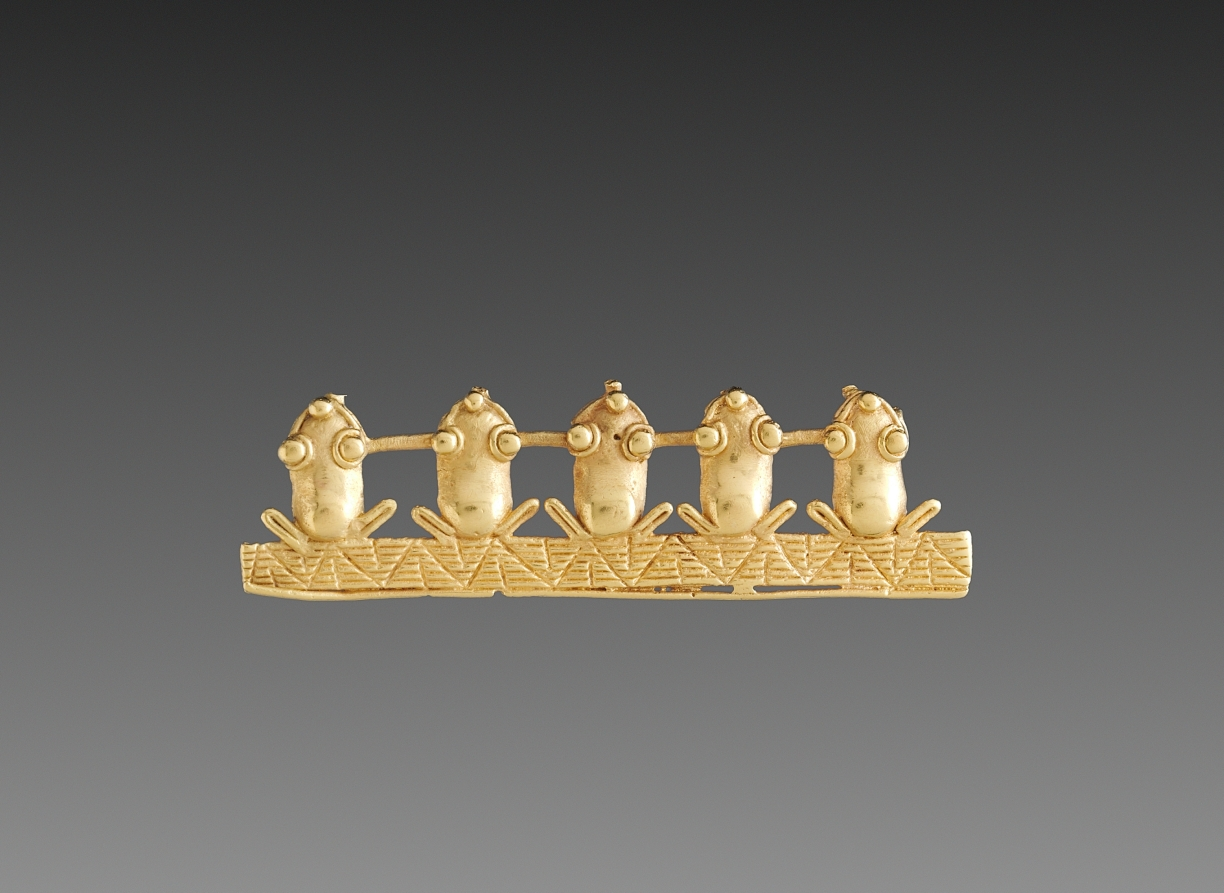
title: Frog Pendant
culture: Panama, Veraguas-Chiriquí style, 11th-16th century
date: c. 1000–1550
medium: cast gold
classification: Metalwork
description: In general, frogs and toads symbolize life-giving water and the green growth it promotes. More surprising is their mythical role as keepers or donors of fire, an association perhaps enhanced by the bright colors that many frogs "flash" when startled, a form of protection. Brightly colored frogs, including those with golden tones, also produce very poisonous toxins, which in part led to a final connection with the underworld and death.